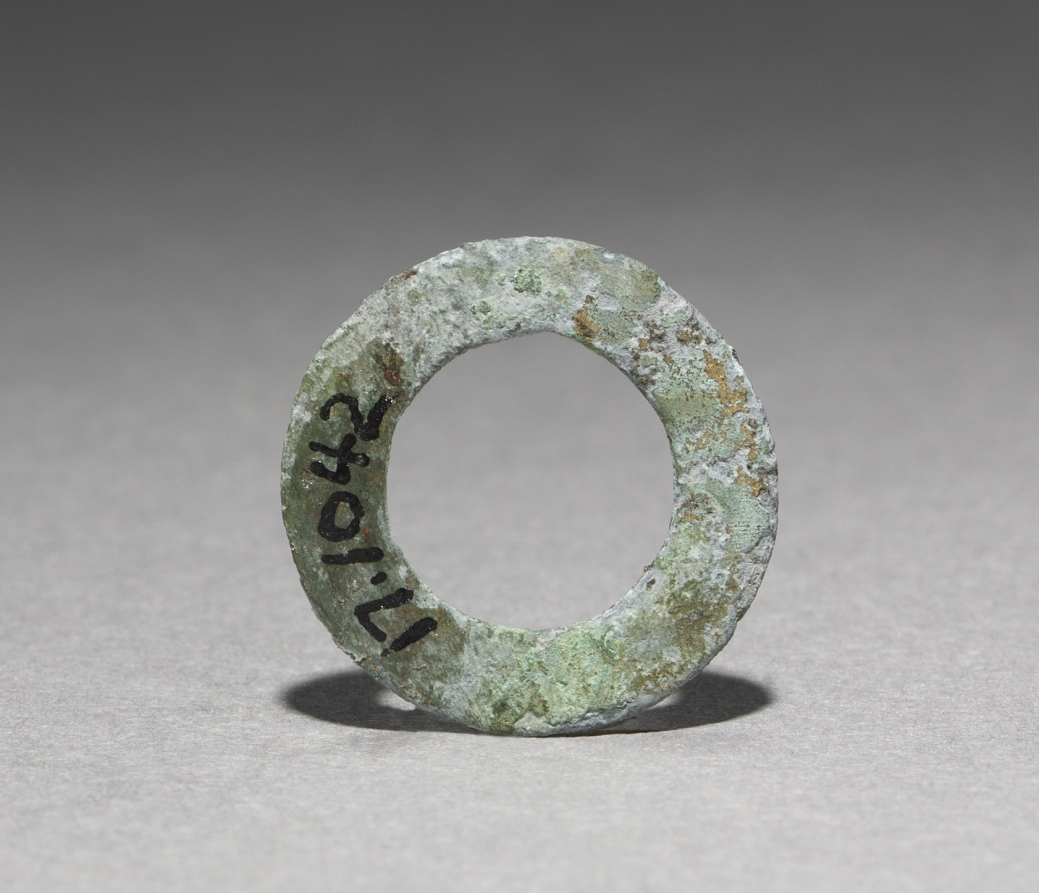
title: Ring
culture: Korea, Goryeo dynasty (918–1392)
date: 918–1392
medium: bronze gilt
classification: Metalwork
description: Both everyday objects and ornaments such as this ring were standard burial goods for the period. Furnishing tombs with an elaborate assemblage of objects was believed to honor and comfort the newly dead. Generally, Goryeo tombs were left untouched until the late 19th century. During the colonial period (1910–45), however, Japanese archaeologists aggressively excavated the tombs located in Kaeseong, the former capital of the Goryeo period. It's highly possible this bronze ring came from one of those excavated tomb sites.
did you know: The Japanese antique dealer Yamanaka & Company, which opened its branches in New York (1895) and Boston (1899), sold small Korean archaeological materials such as this bronze ring to American collectors in the early 20th century.